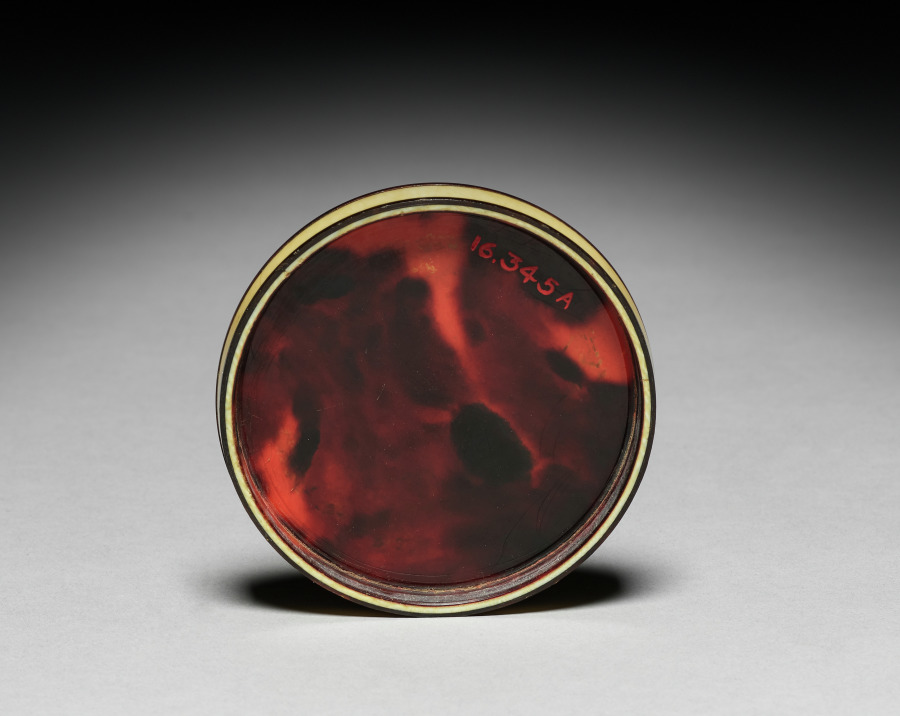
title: Cover for a Snuff Box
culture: Germany, 18th century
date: c. 1770–1775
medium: tortoiseshell and ivory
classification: Miscellaneous